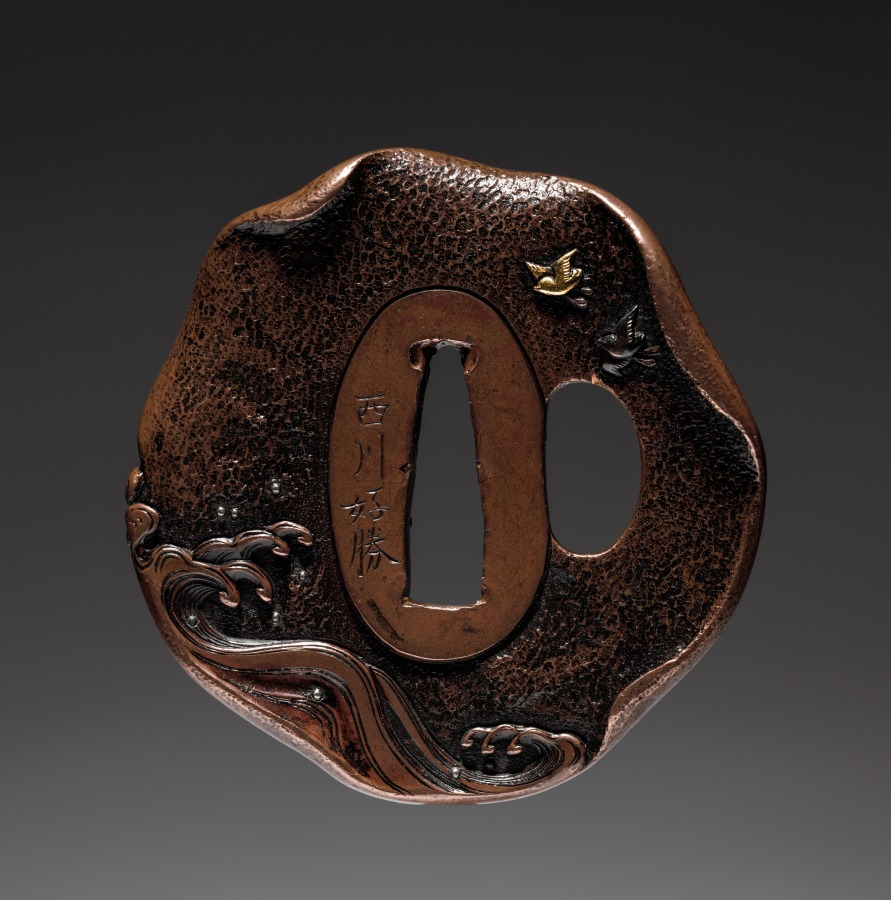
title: Sword Guard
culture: Japan, Edo period (1615–1868)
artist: Nishikawa Yoshikatsu (Japanese)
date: early 1800s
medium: bronze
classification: Arms and Armor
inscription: Signature: Nishikawa Yoshikatsu